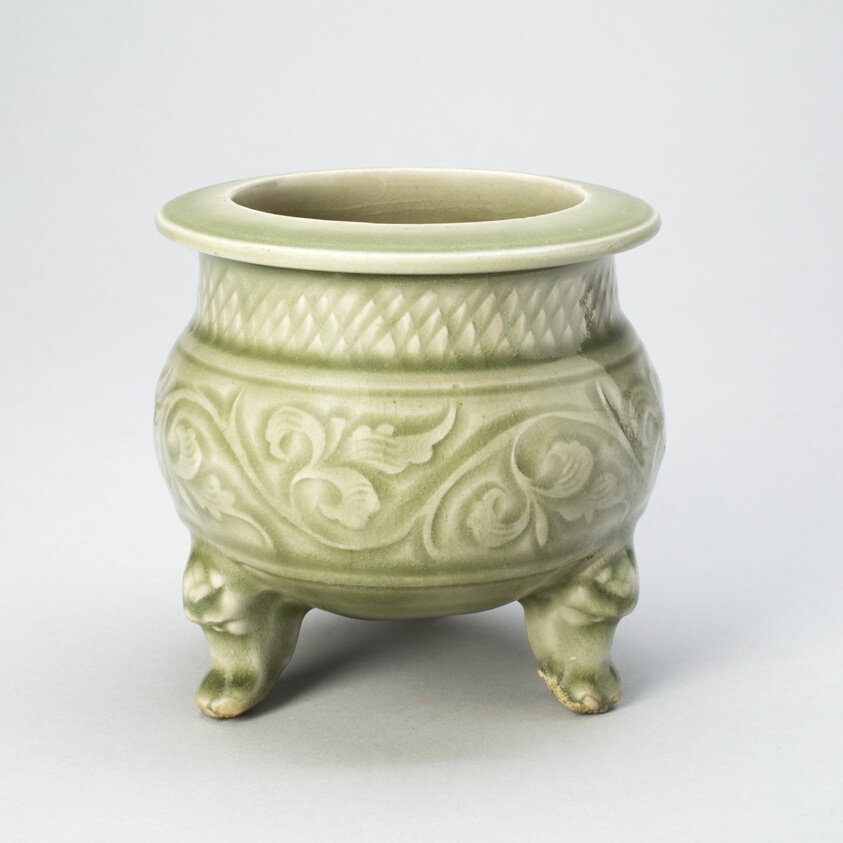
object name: Vessel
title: Tripod Incense Burner (Censer) with Peony-Leaf Scrolls, Netlike Petals, and Masklike Legs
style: Chinese (culture or style)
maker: China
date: Northern Song (960–1127) or Jin dynasty (1115–1234), c. 12th century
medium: Yaozhou ware; stoneware with underglaze carved and molded decoration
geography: China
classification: vessel